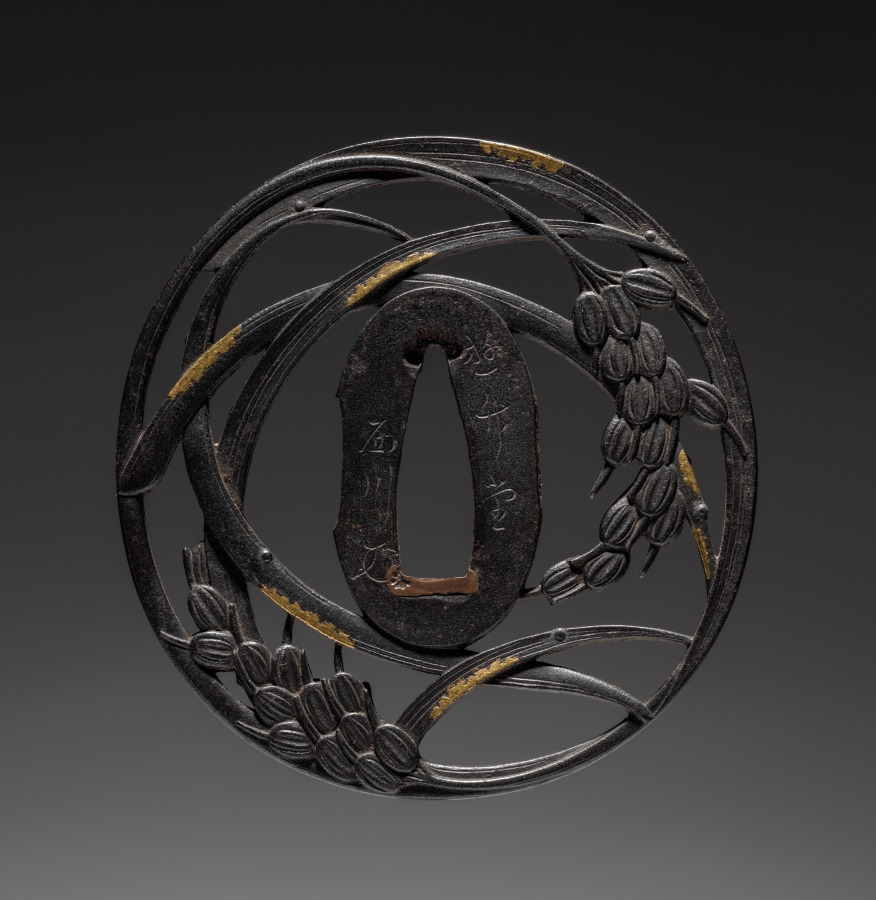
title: Sword Guard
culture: Japan, Edo period (1615–1868)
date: early 1800s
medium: iron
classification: Arms and Armor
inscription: Signature: Yuchikudo Seisen with seal